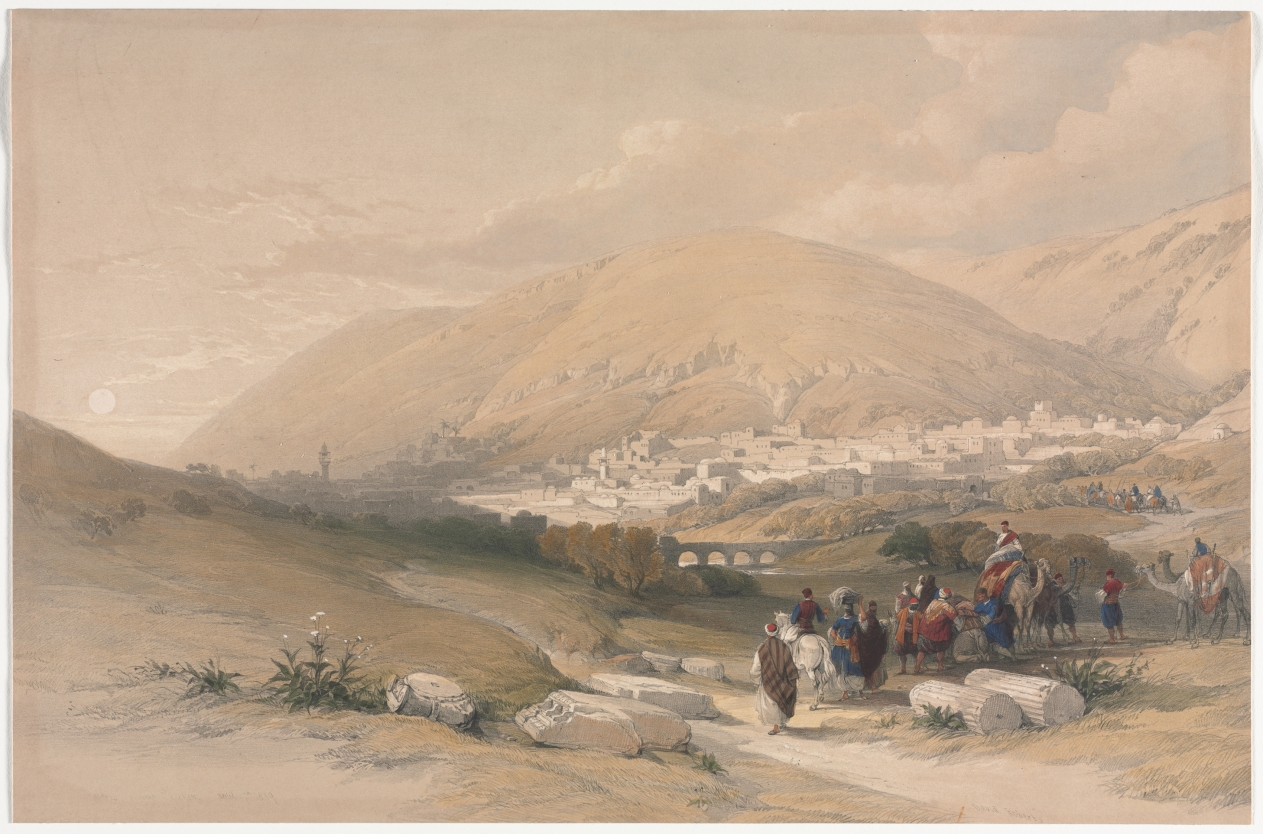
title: Nablus Ancient Shechem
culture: England, 19th century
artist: David Roberts (Scottish, 1796–1864)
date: 1839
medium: color lithograph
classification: Print